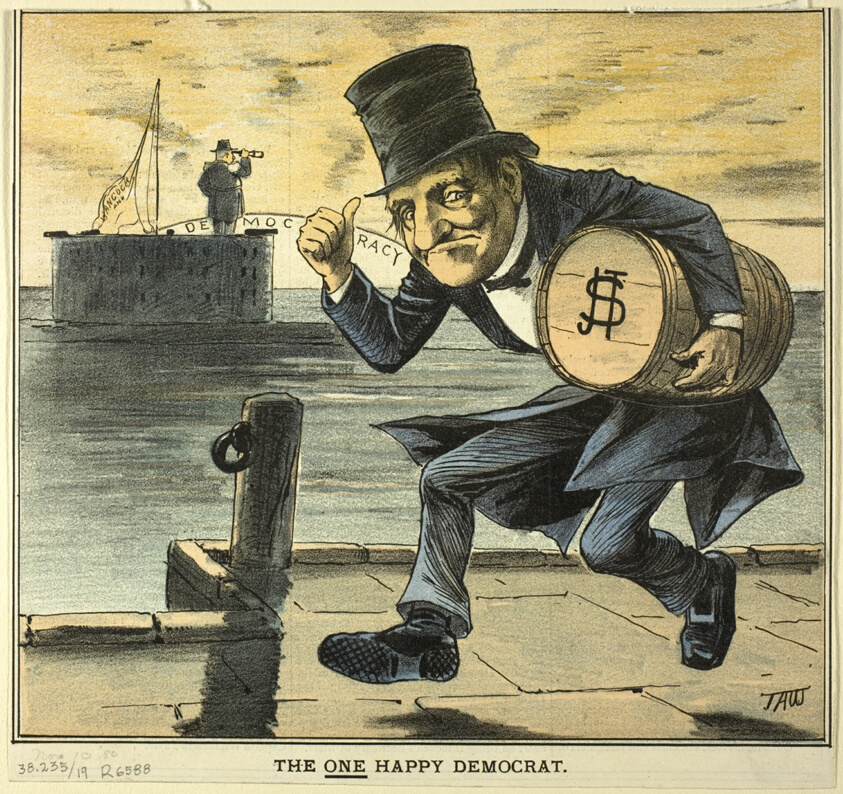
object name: Print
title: The One Happy Democrat, from Puck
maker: James A. Wales (American, 1852-1886)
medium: Color lithograph on newsprint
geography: United States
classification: lithograph; print; prints and drawing